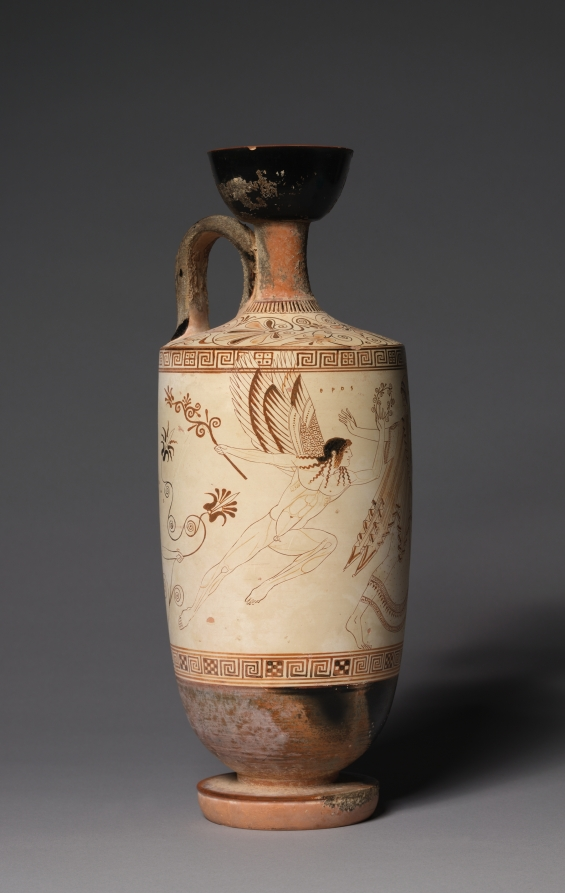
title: White-Ground Lekythos (Oil Vessel): Atalanta and Erotes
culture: Greek, Attic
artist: attributed to Douris (Greek, Attic, active c. 500–470 BCE)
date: 500–490 BCE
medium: ceramic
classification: Ceramic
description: Known as "white-ground" because of the white clay slip applied as a surface for figural decoration, vases of this type give some idea of the appearance of lost ancient large-scale wall paintings. Both remarkably well preserved and masterfully composed, the images cover the entire circumference of the vase. At the center, Atalanta, the virgin huntress renowned for both her speed and her opposition to marriage, races to the right while looking back at Eros, the winged god of love; both figures are named. This Eros, bounding forward, tries to crown her, while two additional Erotes (also named) further hem her in. Love will win.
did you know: Eros, god of love, appears three times on this vase.